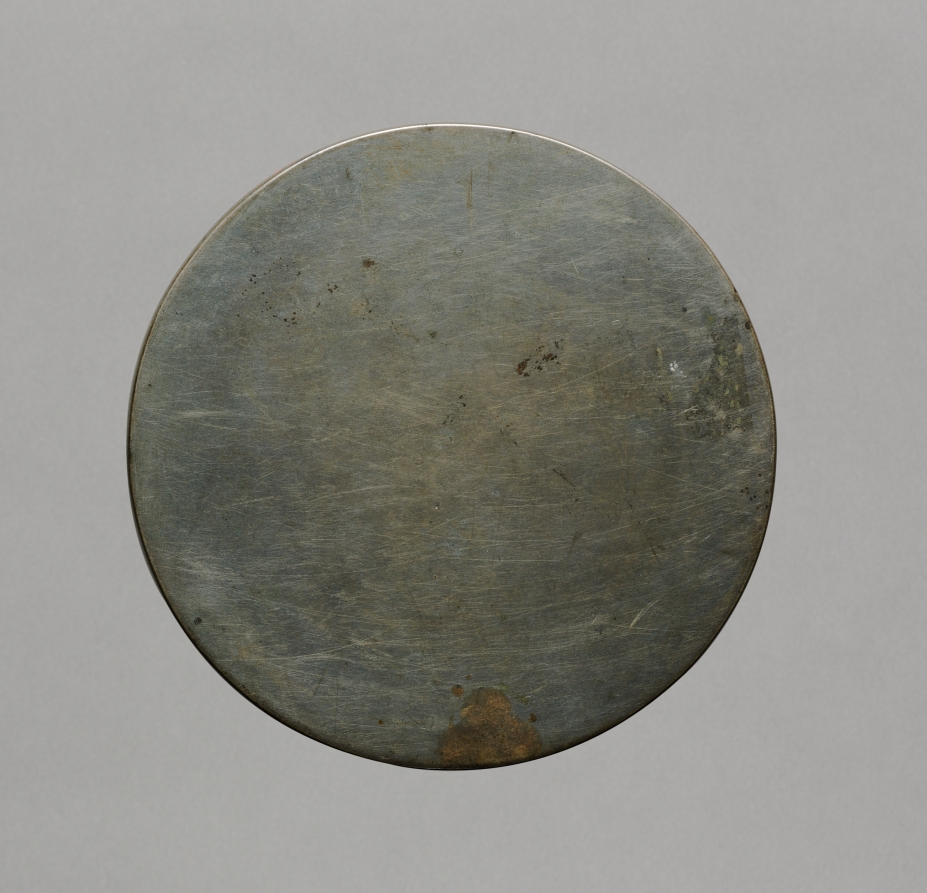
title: Mirror with Pair of Cranes in Chrysanthemum Pattern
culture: Japan, Muromachi period (1392–1573)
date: 1392–1573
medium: bronze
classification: Metalwork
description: The Japanese used chrysanthemums as decorative elements on mirrors. In the Heian period, a chrysanthemum with cranes or long-tailed birds was a common motif. Later, in the Kamakura and Muromachi periods, chrysanthemum designs were divided into three patterns with different symbolic associations: Chrysanthemum with Cranes represented longevity; Water Flowing suggested longevity as well as the Noh drama Kikujido, or Chrysanthemum Boy; and East Fence alluded to the poem "Drinking Wine" by Tao Yuanming (AD 365-427). Here, the mirror featuring Buddhist iconography (kyojo) and a chrysanthemum design on the back shows that the flower was also appreciated in the context of Buddhism in the Kamakura period.